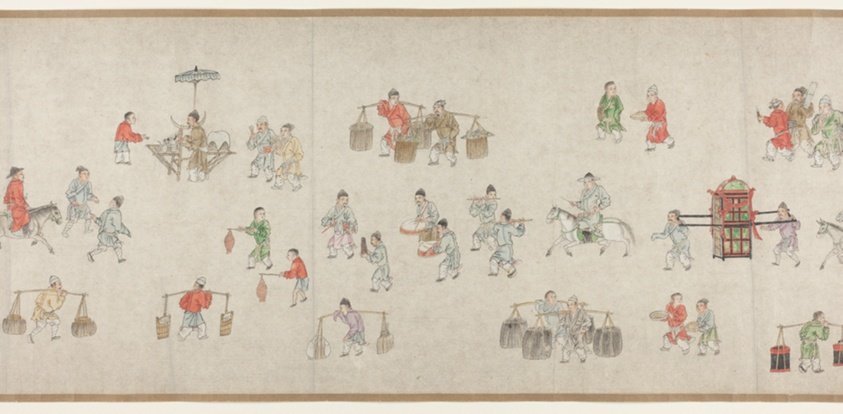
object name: Painting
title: Street Scenes in Times of Peace 太平風會圖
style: Chinese (culture or style)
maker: Zhu Yu (Zhu Junbi) 朱玉（朱君璧）; Chinese, 1293-1365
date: Yuan dynasty (1279–1368), 14th century 元朝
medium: Handscroll; ink and colors on paper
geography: China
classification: handscroll; painting; asian art